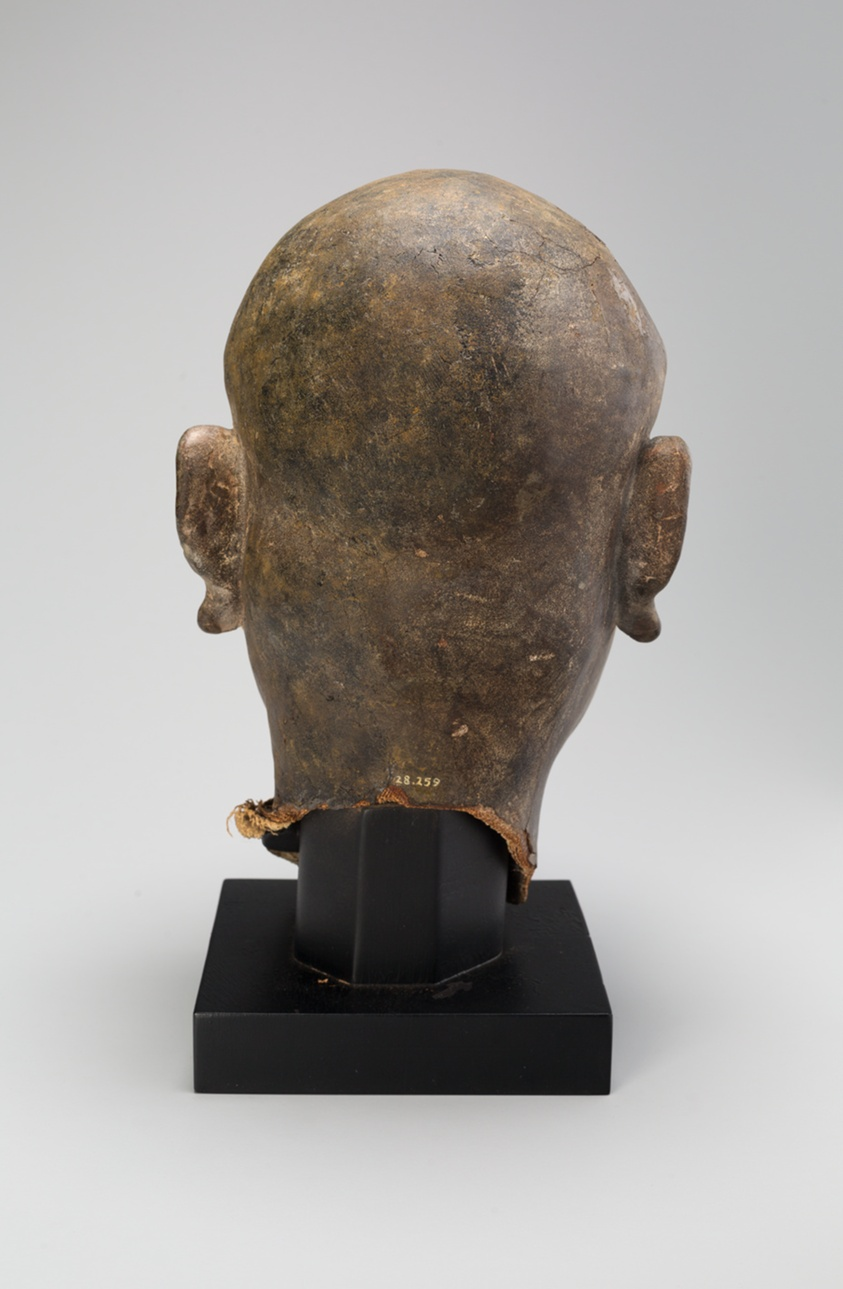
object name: Sculpture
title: Head of a Luohan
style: Chinese (culture or style), northern song, liao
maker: China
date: Northern Song, Liao, or Jin dynasty, c. 11th century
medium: Hollow dry lacquer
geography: China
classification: lacquer; sculpture; asian art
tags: heads, religion, religious figures, Buddhism, Chinese, portraits